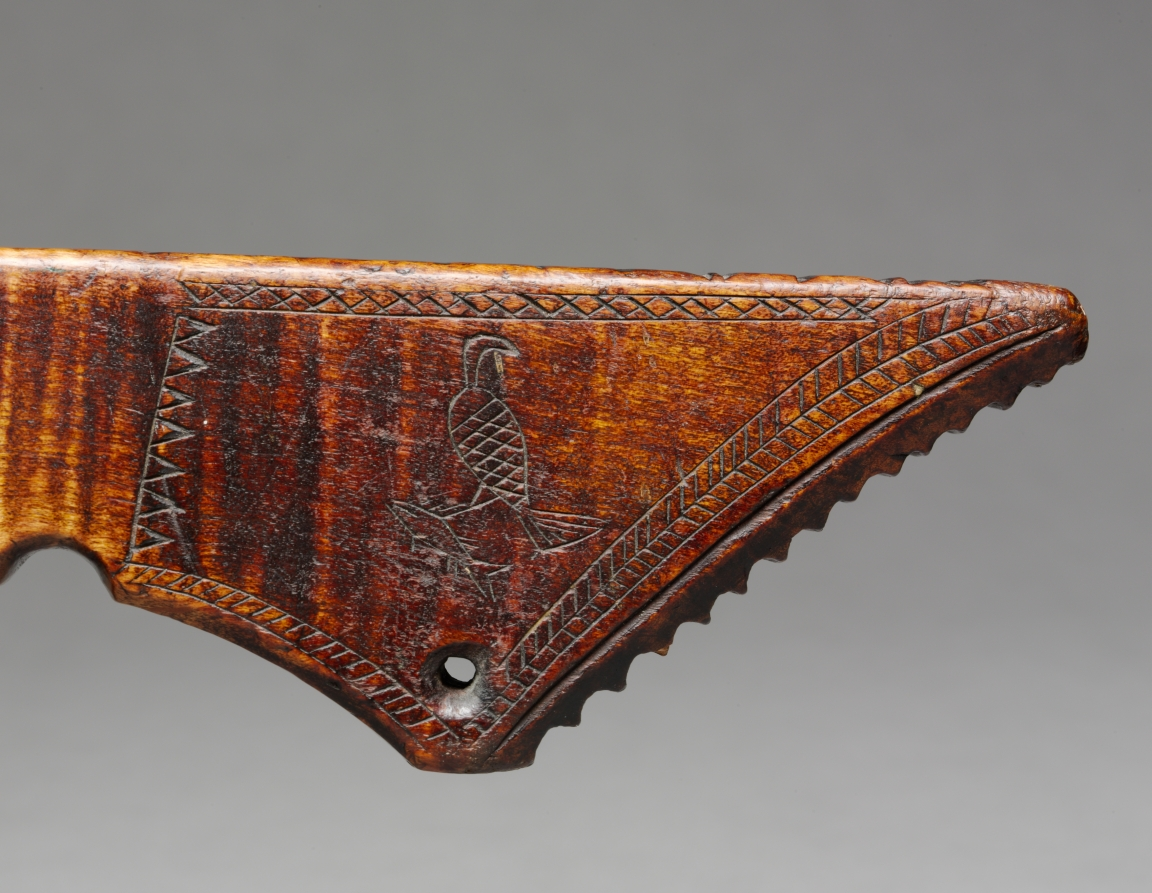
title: Ball-Headed War Club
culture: Native North America, Northeastern Woodlands, Great Lakes, Anishinaabe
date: late 1700s–early 1800s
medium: wood (maple?)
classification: Implements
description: The ball at the striking end of this club is clenched in an abstract, jawlike form that likely refers to a protector animal who endowed the owner with power. Incised on the shaft is a rich record of doodemag (singular, doodem, “totem”)—animals representing other-than-human progenitors from which Anishinaabe peoples trace their descent. (The Anishinaabeg, a group of related Great Lakes nations, include the Odawa, Ojibwe, Potawatomi, and others.) Included is an antlered creature, perhaps a caribou, along with mammals, birds, and powerful spirit beings: the thunderbird, its wings outstretched, and perhaps the long-tailed underwater panther. When this example was made, clubs had become symbols of status and earlier ways of life, having been replaced as favored weapons by metal tomahawks and European firearms. Today, clubs are part of powwow regalia.